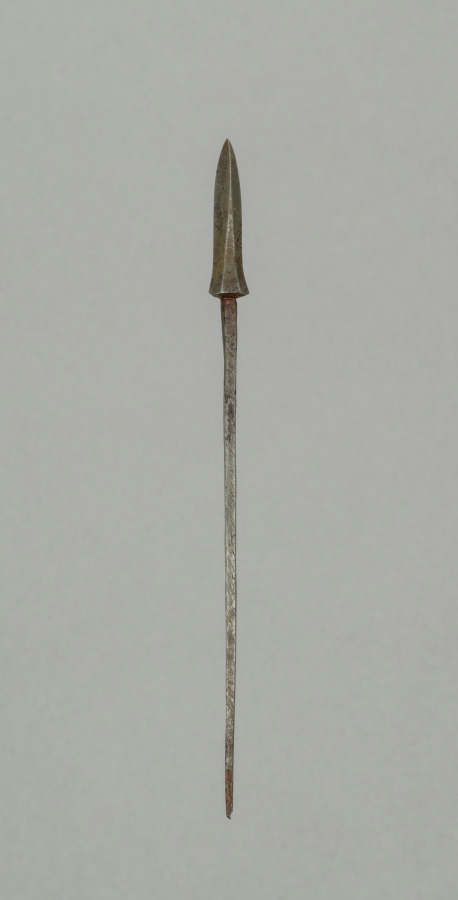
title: Arrow Point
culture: Japan, Edo period (1615–1868)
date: 1700s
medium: steel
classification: Arms and Armor